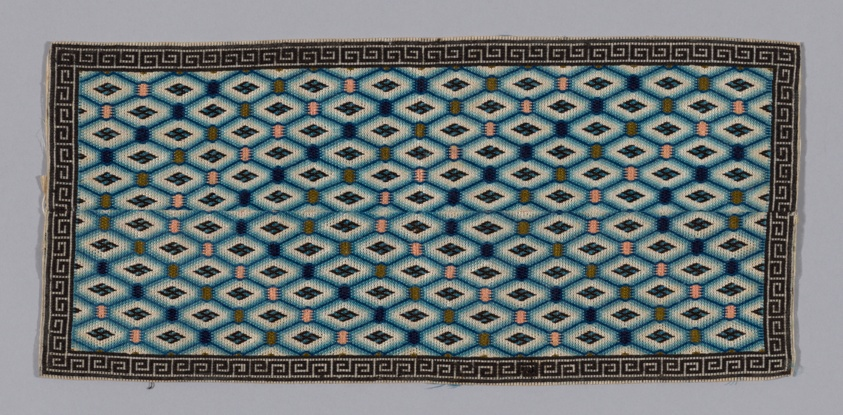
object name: Textile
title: Panel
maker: China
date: 1875/1900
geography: China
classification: textile; needlework - costume; needlework (visual works)